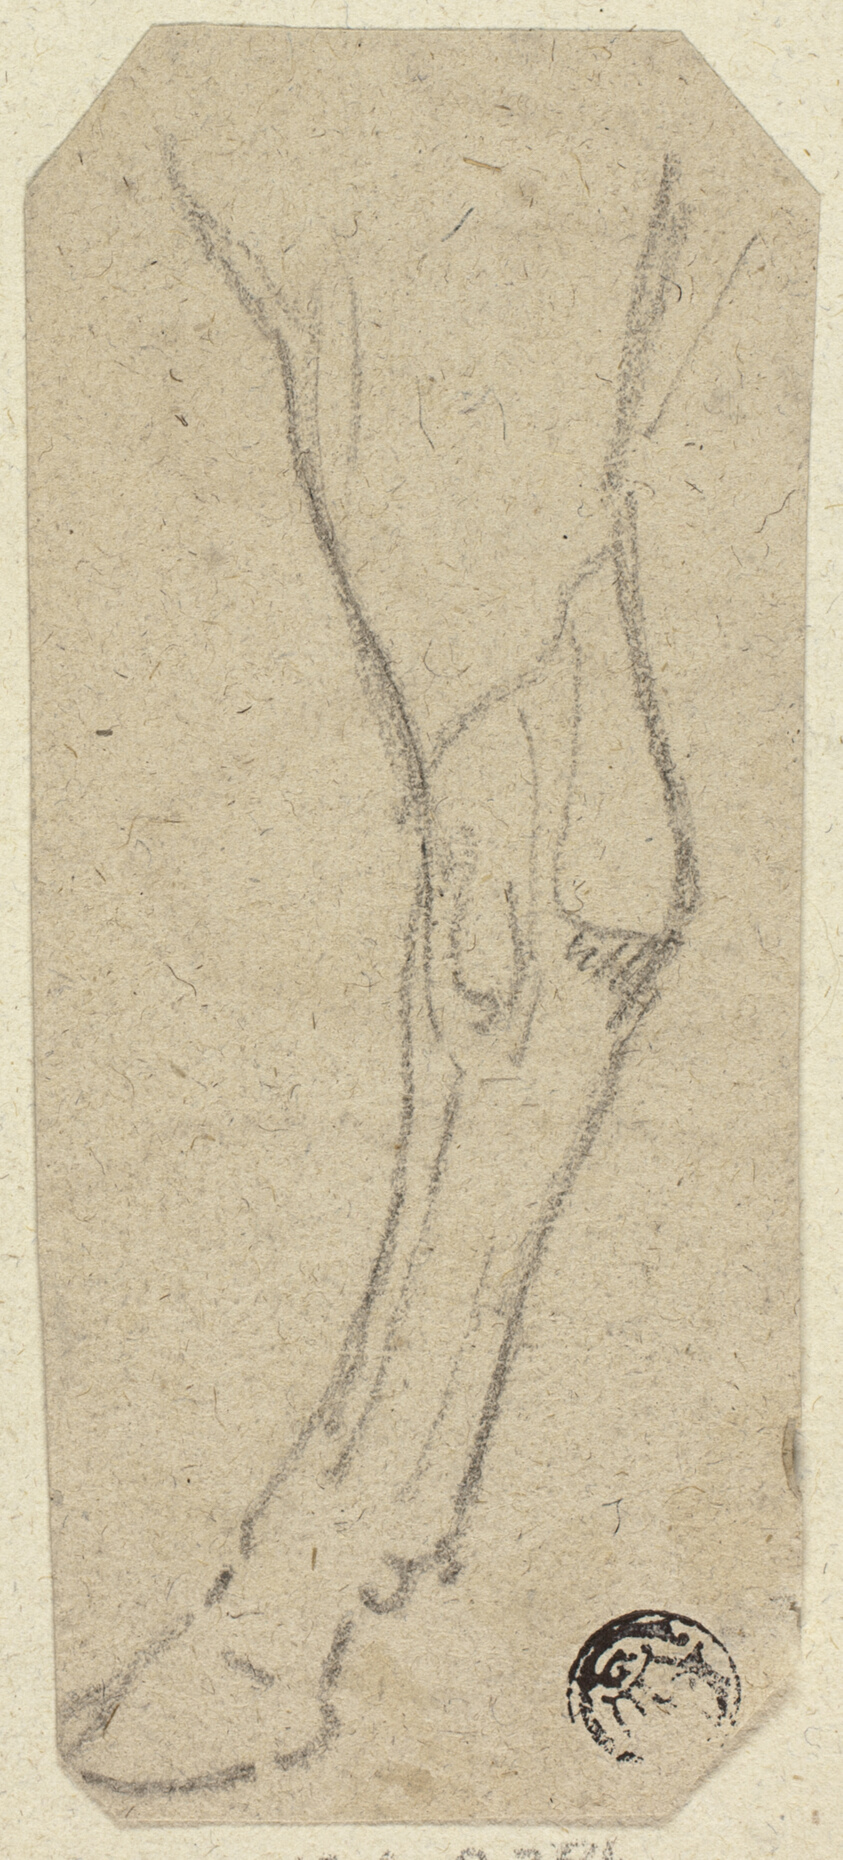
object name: Drawing and Watercolor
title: Cow's Leg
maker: Unknown Artist; English, 19th century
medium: Charcoal on buff laid paper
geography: United Kingdom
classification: charcoal; paper; drawings (visual works); prints and drawing